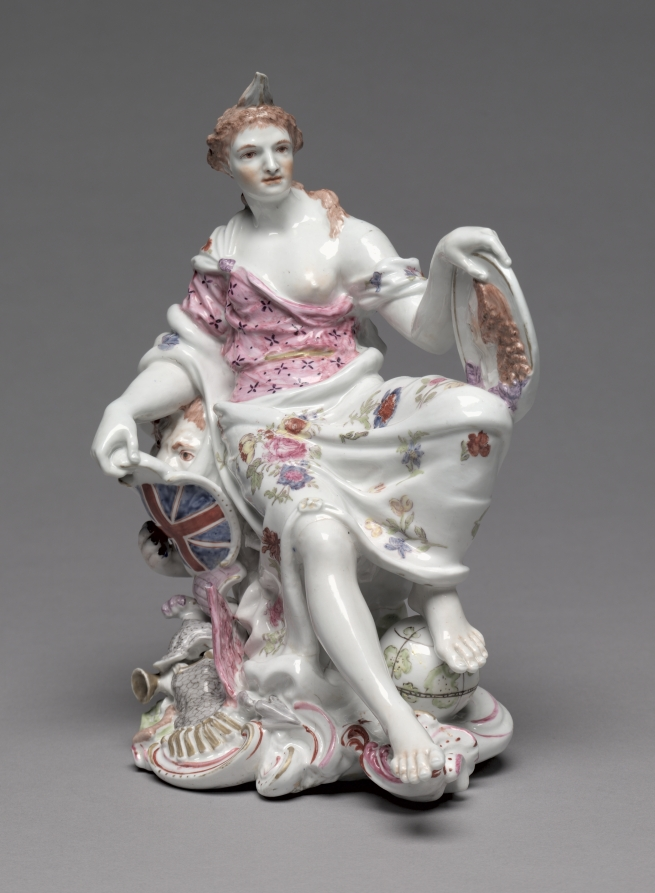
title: Figure of Britannia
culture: England, Staffordshire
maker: Longton Hall Porcelain Factory (British, Staffordshire, 1749–60)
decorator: Vauxhall Porcelain Factory (British, 1751–1764)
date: c. 1756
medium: soft-paste porcelain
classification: Ceramic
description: In this depiction of Britannia, the figure is surrounded by symbols of England’s power and military might. On one side, she and a lion, another symbol of Britain, support a shield adorned with the Union flag. Below it lay motifs associated with war such as armor, a trumpet, and a flag. On her left, Britannia presents a medallion to the viewer as she rests her feet on a globe, a symbol of the nation’s territorial aspirations. The portrait may depict the reigning king, George II (1683–1760), or Prince Frederick Louis (1707–1751), his recently deceased heir.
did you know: The creation of this triumphant personification of the nation was likely spurred on by Great Britain’s conflict with France in the Seven Years’ War (1756–63).